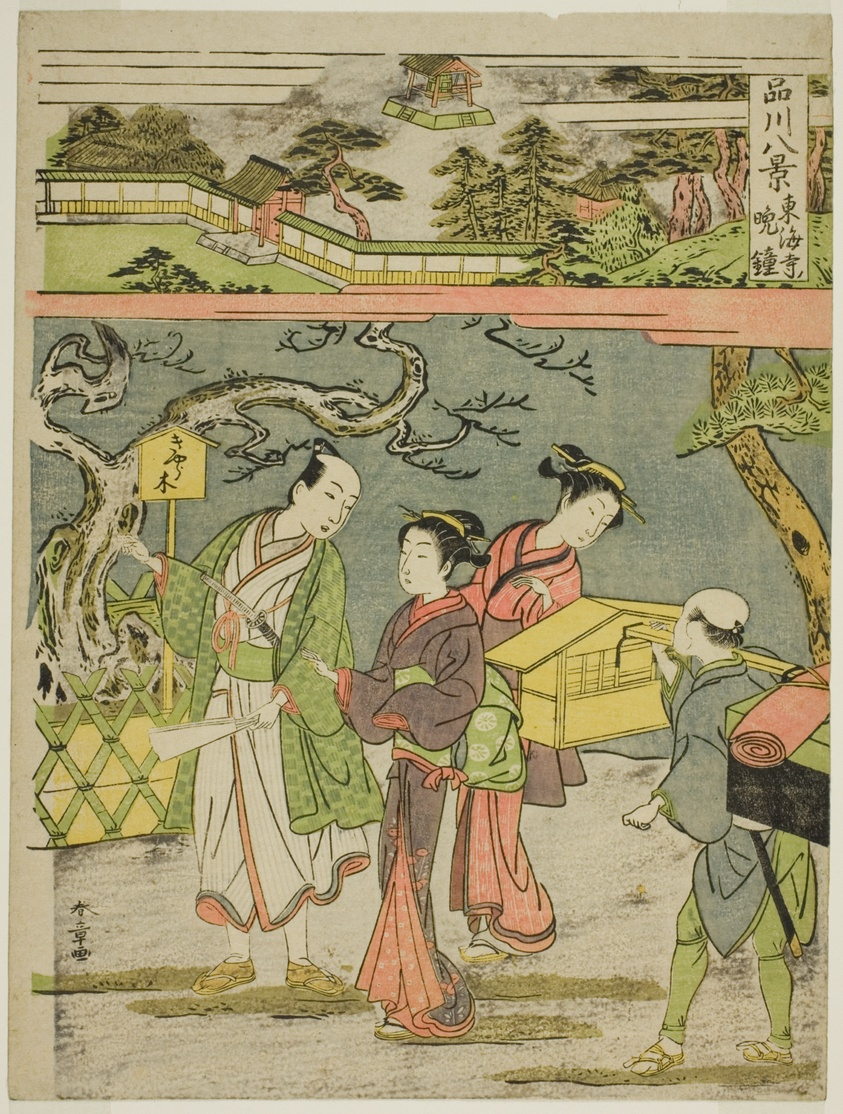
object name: Print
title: Tokaiji no Bansho, from the series "Shinagawa Hakkei (Eight Views of Shinagawa)"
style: Japanese (culture or style)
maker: Katsukawa Shunsho 勝川 春章; Japanese, 1726-1792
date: c. 1771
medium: Color woodblock print; chuban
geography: Japan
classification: woodblock print; print; asian art